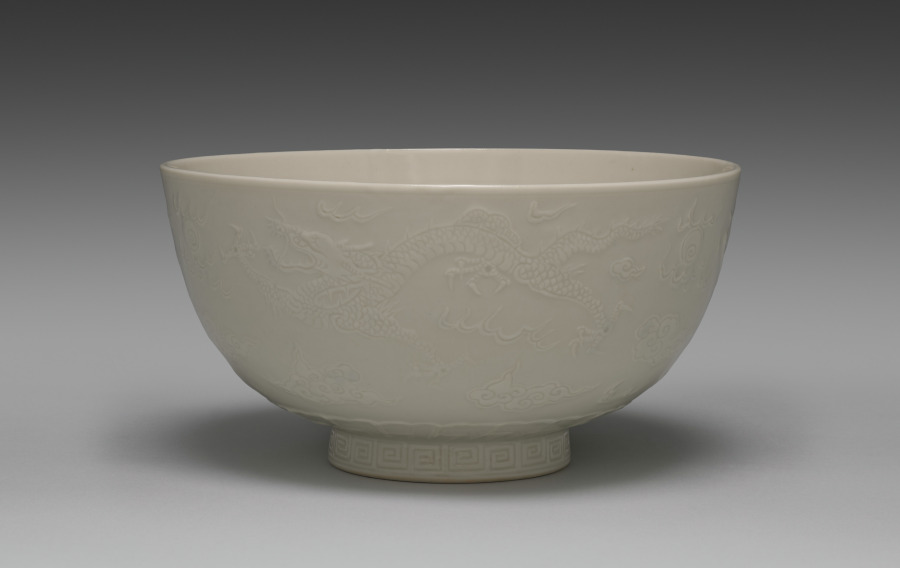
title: Bowl with Dragons Chasing Flaming Jewels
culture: Japan, Meiji period (1868–1912) to Taishō period (1912–26)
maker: Seifū Yohei III (Japanese, 1851–1914)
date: 1893–97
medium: Porcelain with molded and carved design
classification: Ceramic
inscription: 大日本清風造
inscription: 清風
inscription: 清風與平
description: The decoration of this large bowl, described as a donburi on one side of its box, is executed entirely in molded and carved relief under a creamy, pink-tinged translucent glaze. The main motif is a pair of four-clawed dragons pursuing flaming jewels. As is standard for this design, the beasts are surrounded by wisps of cloud, and a foliate pattern runs around the bottom of the basin. A geometric pattern circles the exterior of the footring. The white-on-white design makes the bowl subtle and elegant.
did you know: Kyoto-based Japanese ceramist Seifū Yohei III (1851–1914) admired the glaze colors found on Chinese porcelain and tried to replicate them through intensive experimentation.